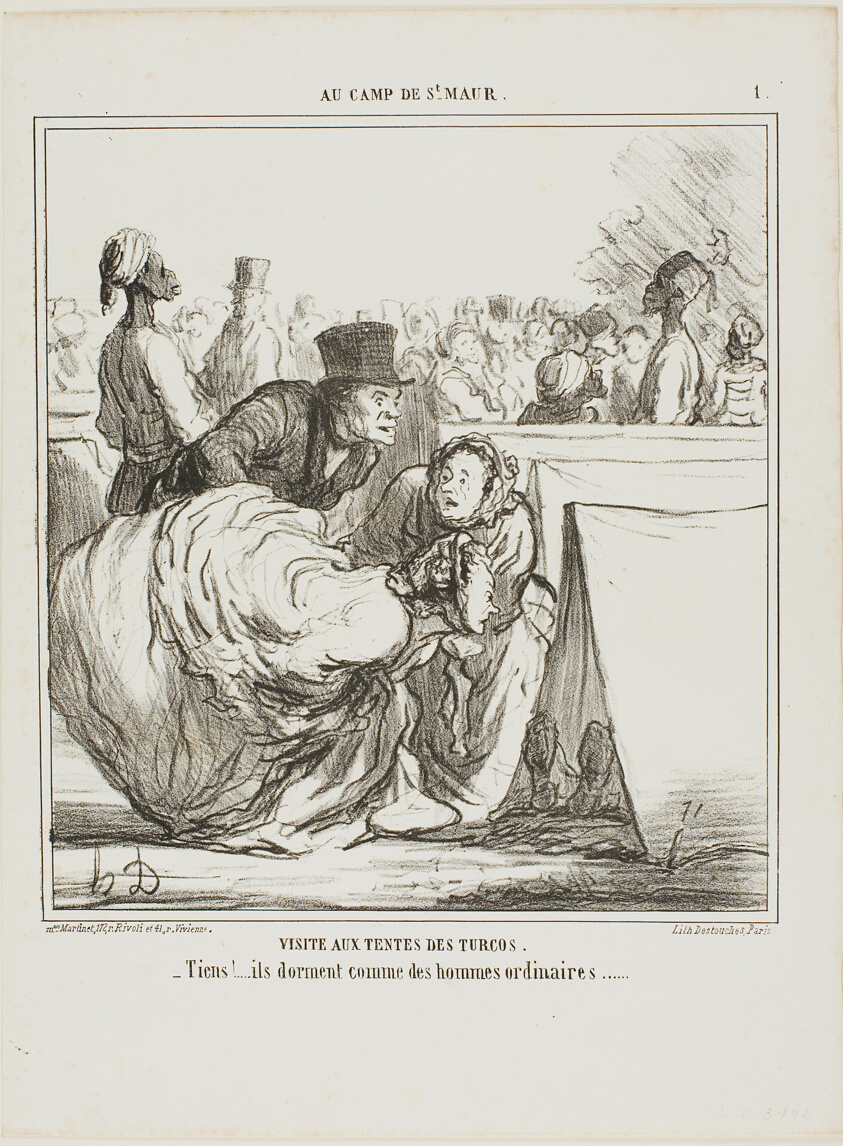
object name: Print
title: “I don't want to go into such a deep water...... there are surely big fish in there!,” plate 1 from Enfantillages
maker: Honoré Victorin Daumier; French, 1808-1879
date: 1859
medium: Lithograph in black on white wove paper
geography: France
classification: lithograph; print; prints and drawing